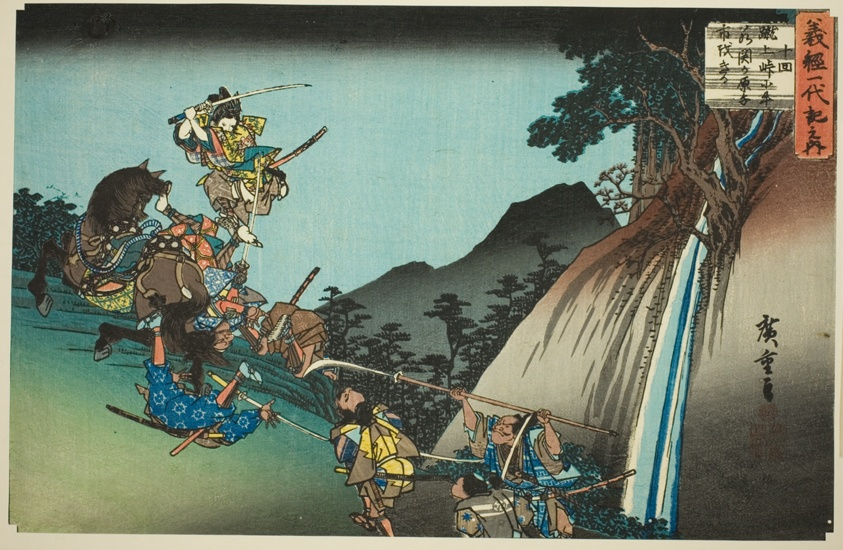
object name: Print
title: No. 10: Ushiwaka Defeats Sekigahara Yoichi at Keage Mountain Pass (Jukkai, Keage toge ni Ushiwaka Sekigahara Yoichi uchikiru), from the series "The Life of Yoshitsune (Yoshitsune ichidaiki no uchi)"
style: Japanese (culture or style)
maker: Utagawa Hiroshige 歌川 広重; Japanese, 1797-1858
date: c. 1832/34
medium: Color woodblock print; oban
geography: Japan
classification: woodblock print; print; asian art